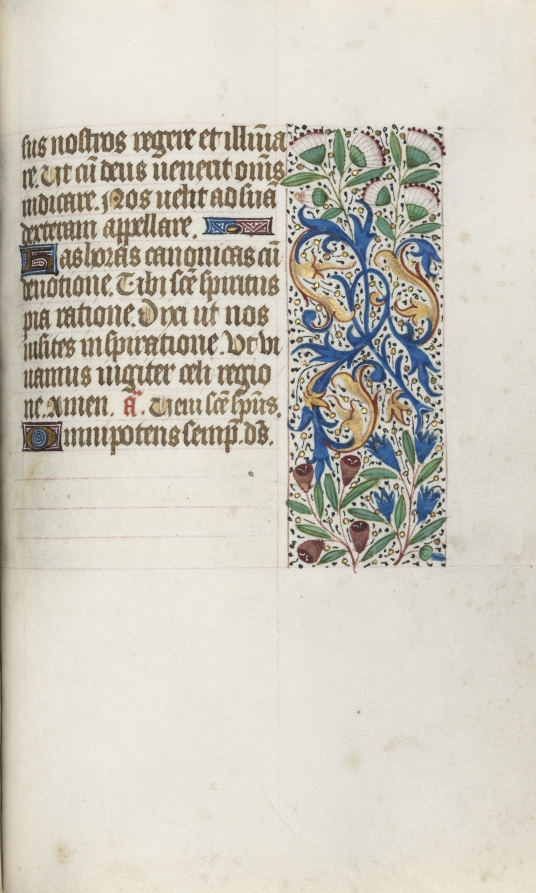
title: Book of Hours (Use of Rouen): fol. 102r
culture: France, Rouen, 15th century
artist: Master of the Geneva Latini (French, active Rouen, 1460–80)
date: c. 1470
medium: ink, tempera, and gold on vellum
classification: Bound Volume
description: In the late 1400s and early 1500s Rouen was an established and important center of book production. The city’s cathedral had a wealthy chapter that spent large sums of money to commission books and to maintain its extensive library. The stationers and booksellers would have likely been concentrated in or near the cathedral precinct. This artist, named after a manuscript now in Geneva, was Rouen’s principal illuminator during the second half of the 1400s.